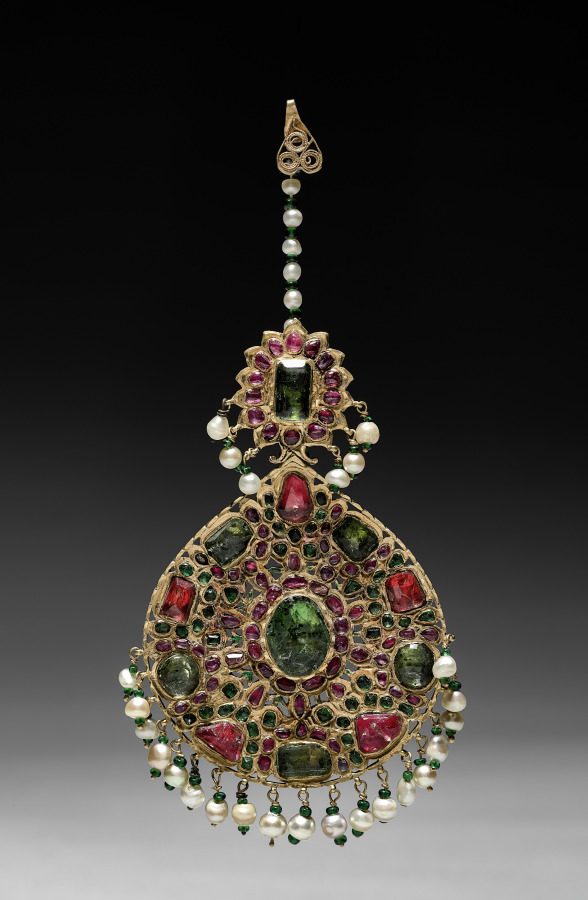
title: Pendant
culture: India, Bengal (?)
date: 1800s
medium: gold with emeralds and rubies, enamel and pearl pendants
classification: Jewelry